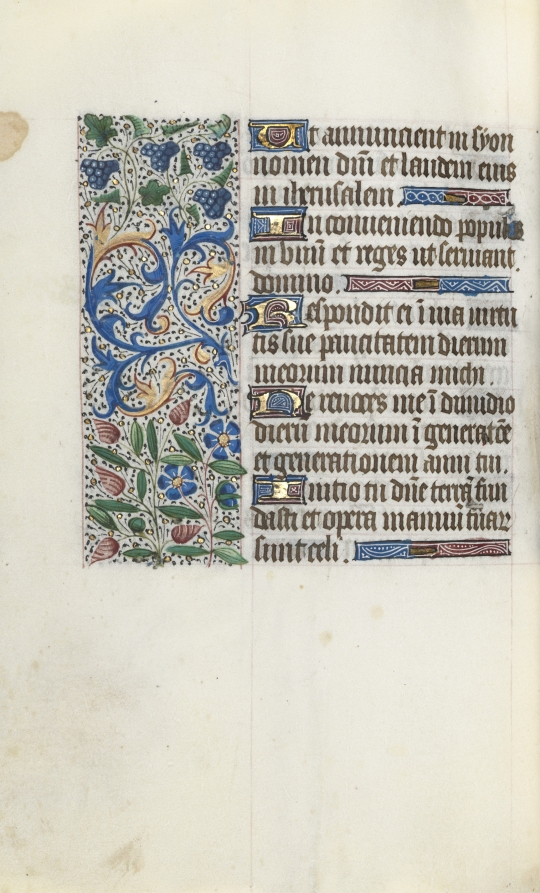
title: Book of Hours (Use of Rouen): fol. 89v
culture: France, Rouen, 15th century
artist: Master of the Geneva Latini (French, active Rouen, 1460–80)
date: c. 1470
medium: ink, tempera, and gold on vellum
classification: Bound Volume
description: In the late 1400s and early 1500s Rouen was an established and important center of book production. The city’s cathedral had a wealthy chapter that spent large sums of money to commission books and to maintain its extensive library. The stationers and booksellers would have likely been concentrated in or near the cathedral precinct. This artist, named after a manuscript now in Geneva, was Rouen’s principal illuminator during the second half of the 1400s.